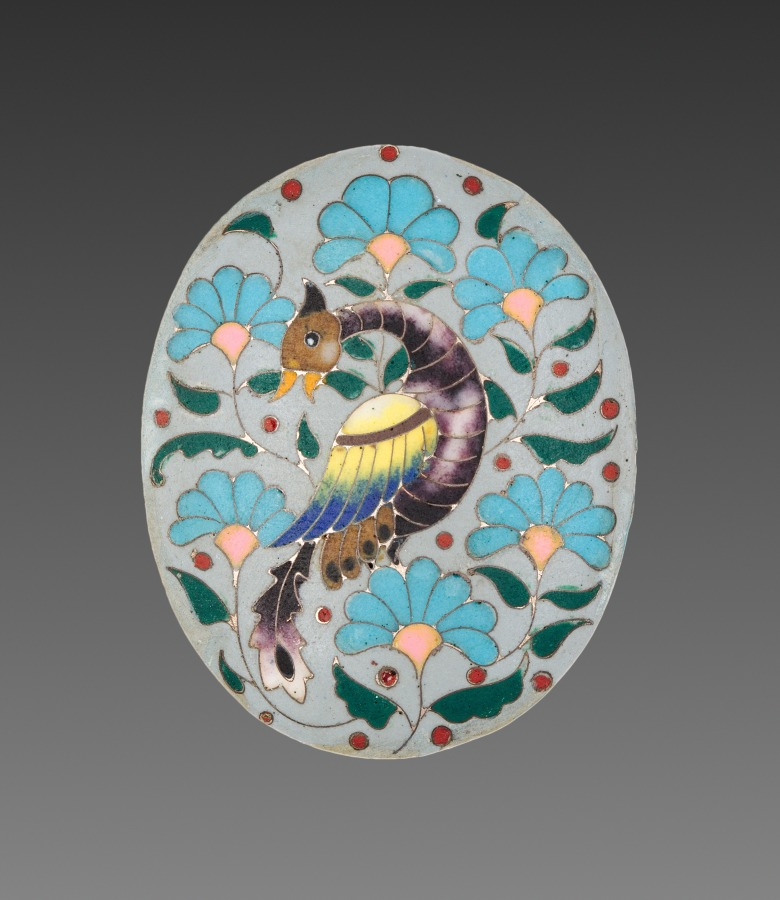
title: Locket Panel (4 of 4)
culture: France, 19th century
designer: Alexis Falize (French, 1811–1898)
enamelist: Antoine Tard (French, active 1860–1889)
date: 1800s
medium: gold and cloisonné enamel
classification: Jewelry